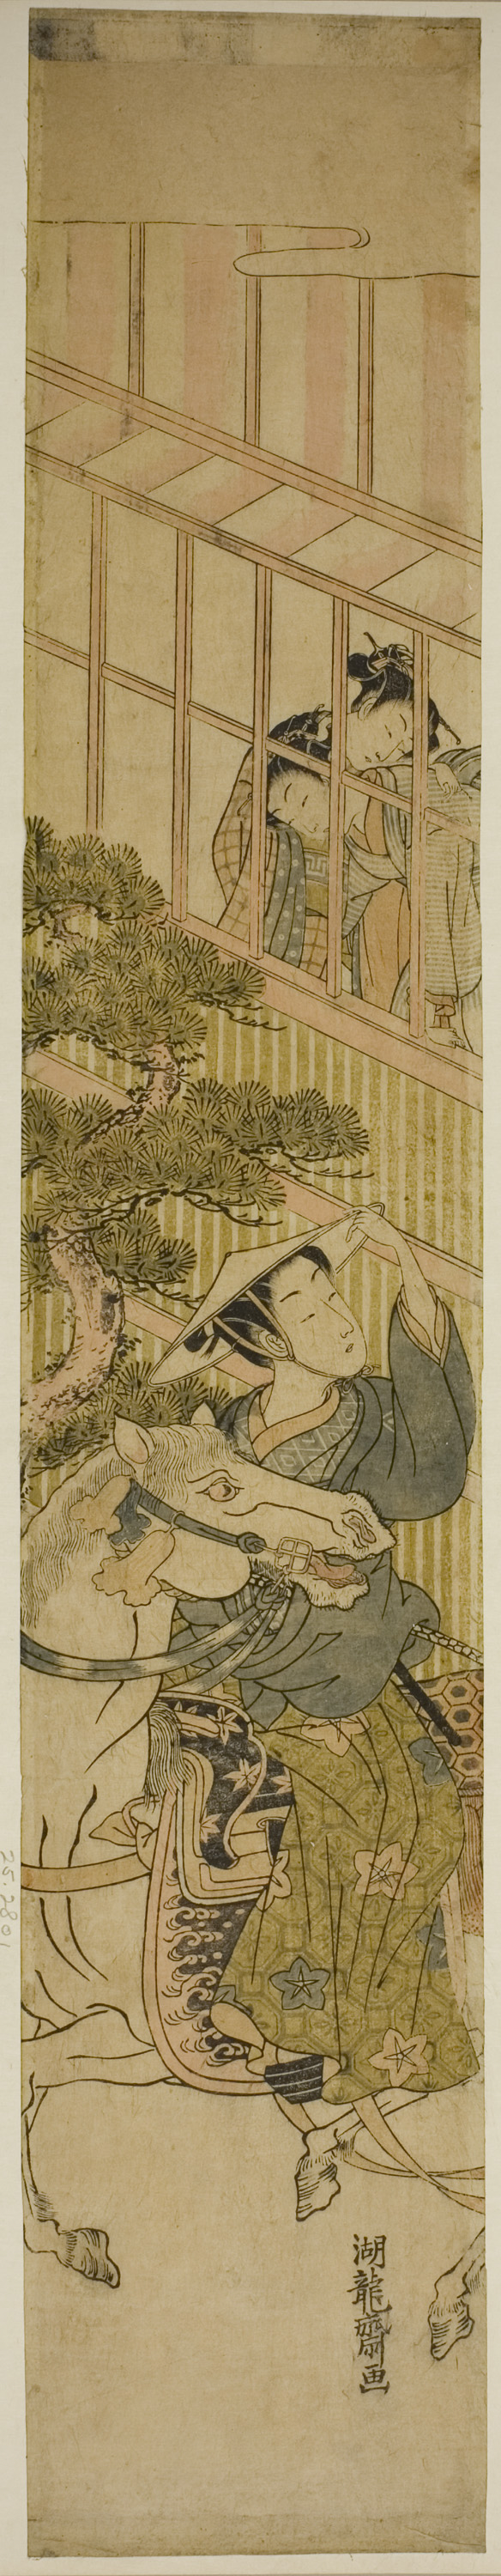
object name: Print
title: Young Man on Horseback and Two Women Watching from a Window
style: Japanese (culture or style)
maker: Isoda Koryusai (Japanese, 1735-1790)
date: c. 1770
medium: Color woodblock print; hashira-e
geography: Japan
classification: woodblock print; print; asian art